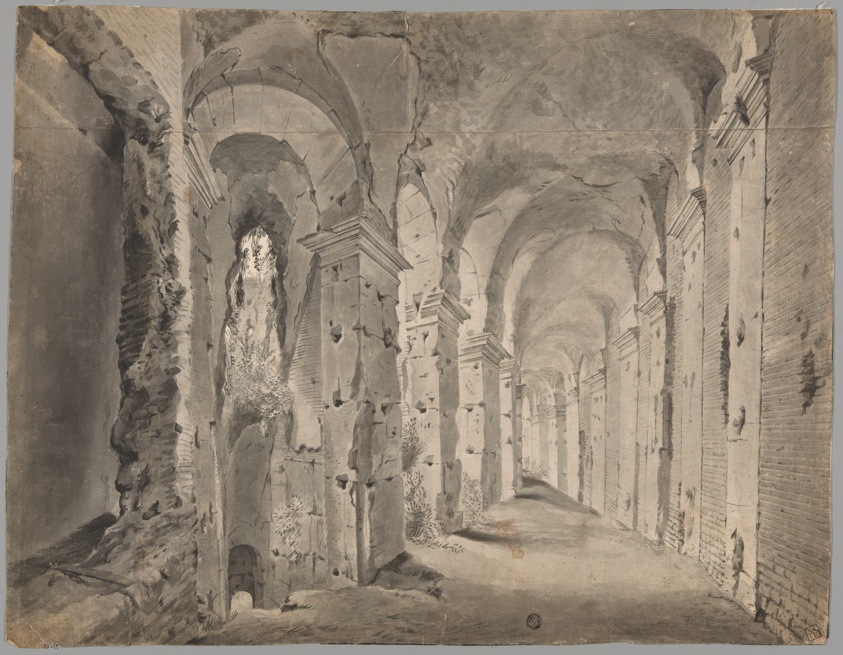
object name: Drawing and Watercolor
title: Large Ruined Portico or Corridor (recto); Sketches of a Draped Figure and Architecture (verso)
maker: School of Paul Bril (Flemish, 1554-1626)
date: c. 1600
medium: Brush and black ink, with black wash (recto), and red and black chalk (verso), on pieced cream laid paper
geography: Flanders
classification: ink or chalk wash; drawings (visual works); prints and drawing